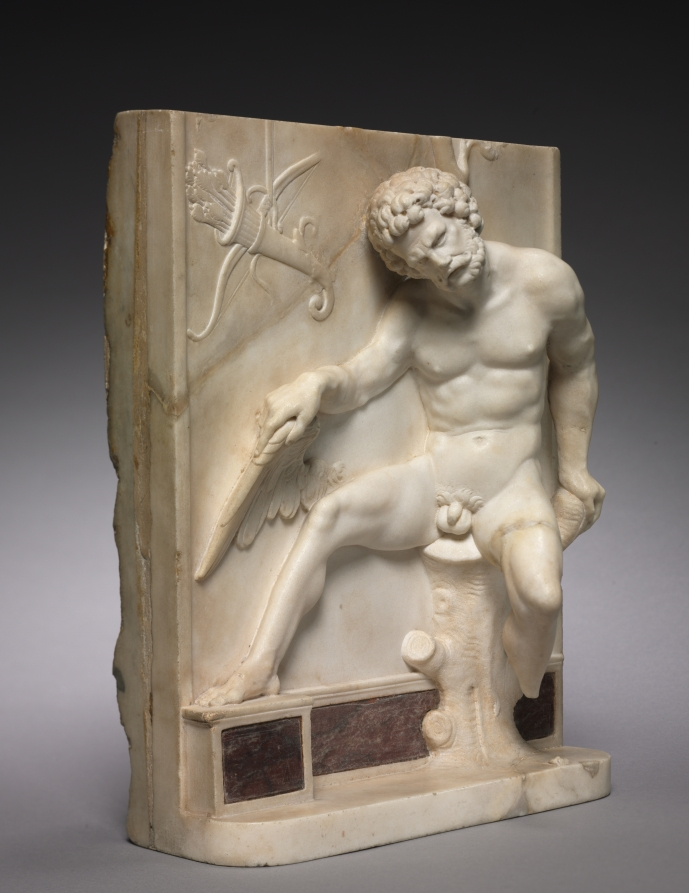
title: Philoctetes on the Island of Lemnos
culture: Italy, 16th century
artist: workshop of Giovanni Maria Mosca (Italian, 1495/99–1574)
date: c. 1510–1515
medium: marble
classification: Sculpture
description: A snake bit the Greek warrior Philoctetes en route to the Trojan War. The stench of the infected wound led the ship’s crew to abandon him on the island of Lemnos, where he fans the agonizing injury with a bird’s wing. The warrior’s noble suffering in the face of tremendous pain would have been a classical model of stoic composure, highly valued in Renaissance court culture.